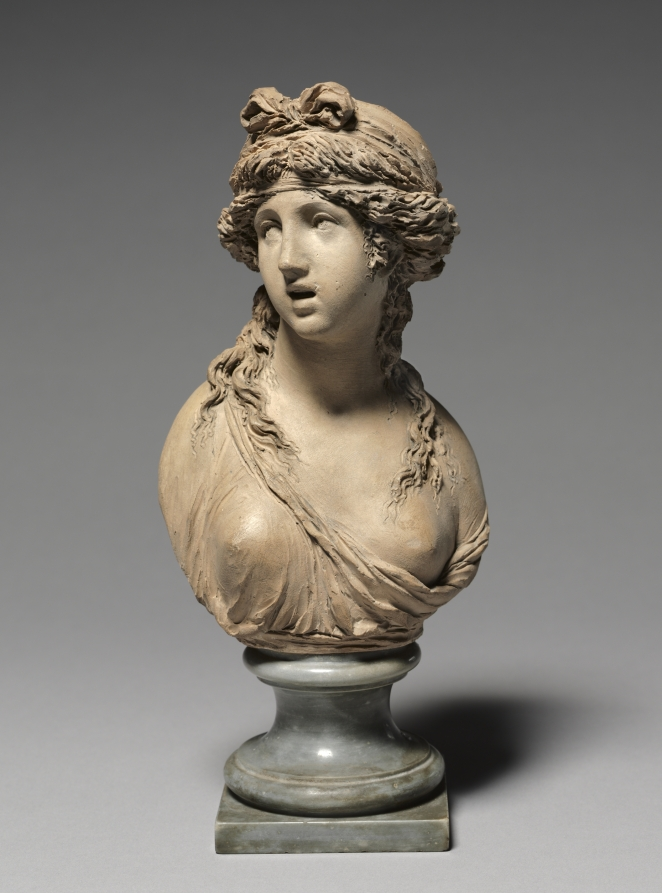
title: Bust of a Woman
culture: France, 19th century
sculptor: Joseph-Charles Marin (French, 1759–1834)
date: 1800–1834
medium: terracotta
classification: Sculpture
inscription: inscribed, back of sculpture below neck: Marin.